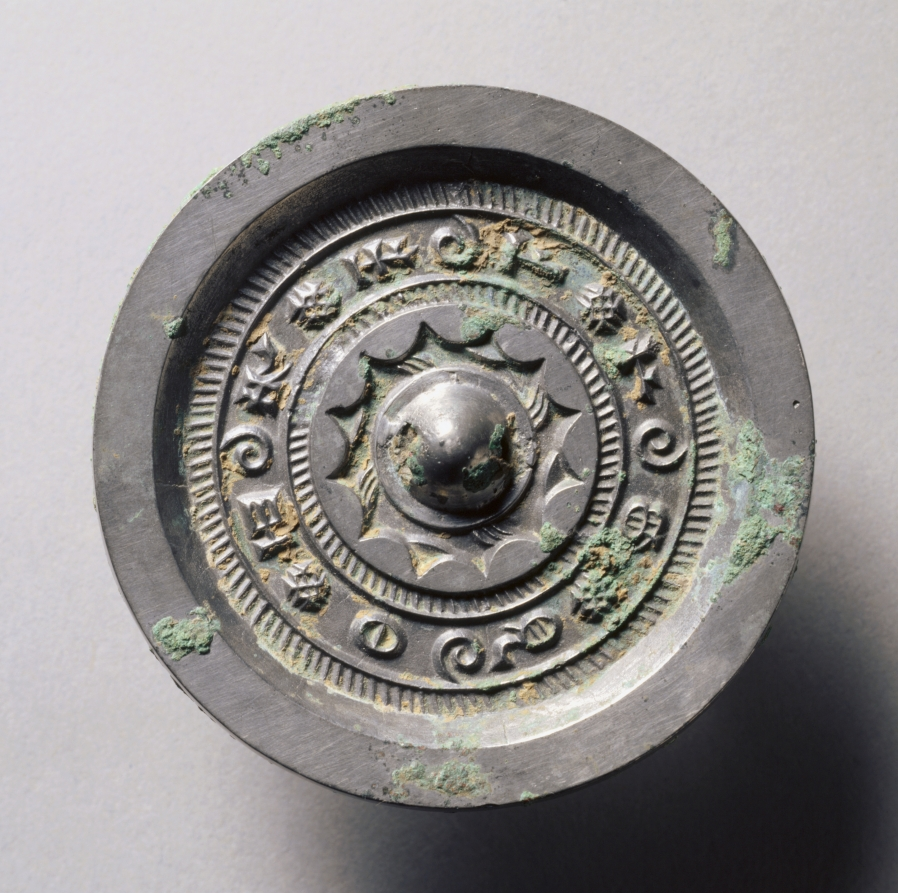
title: Mirror with Concentric Circles and Linked Arcs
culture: China, Western Han dynasty (206 BCE–8 CE)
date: late 200s–9 BCE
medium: bronze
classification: Metalwork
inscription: 見日之光，天下大明。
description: Inscription: By the light of the sun, The world is made bright.